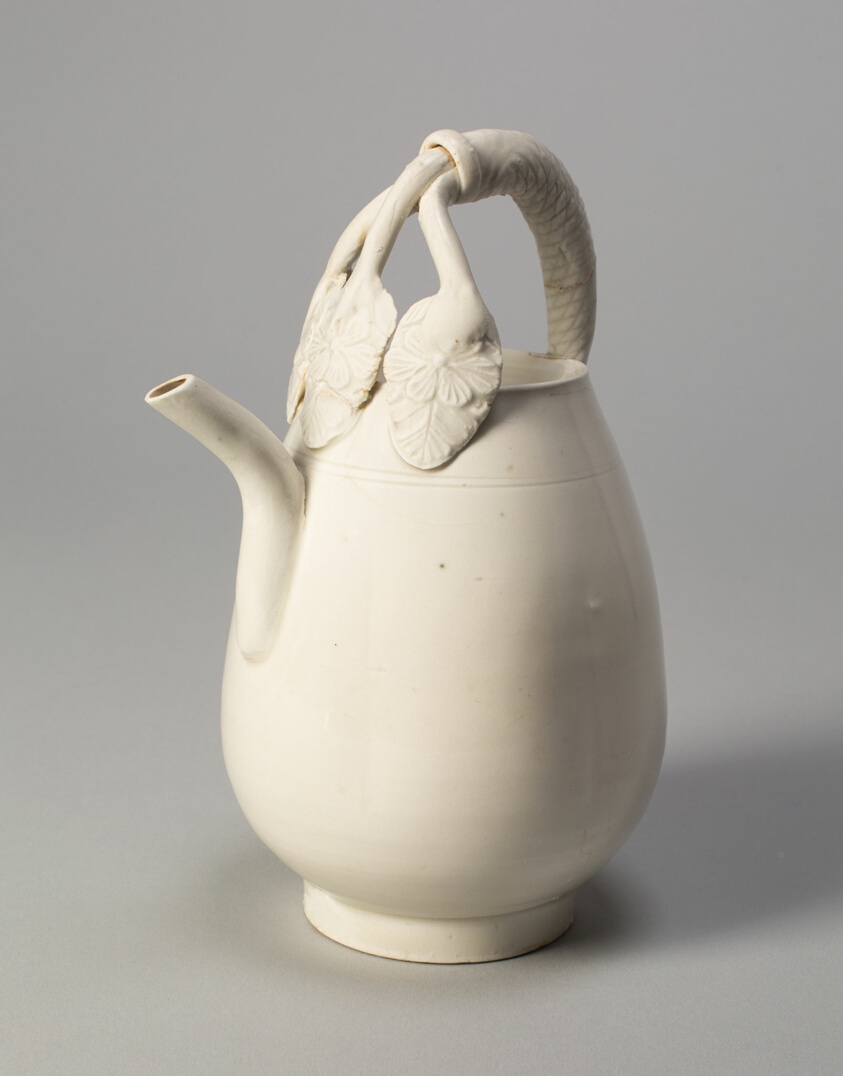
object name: Vessel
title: Melon-Shaped Ewer with Triple-Strand Handle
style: Chinese (culture or style)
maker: China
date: Liao dynasty (907–1124), 11th century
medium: Glazed porcelain with underglaze mold-impressed decoration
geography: China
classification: ewer (vessel); vessel; porcelain; ceramics; asian art